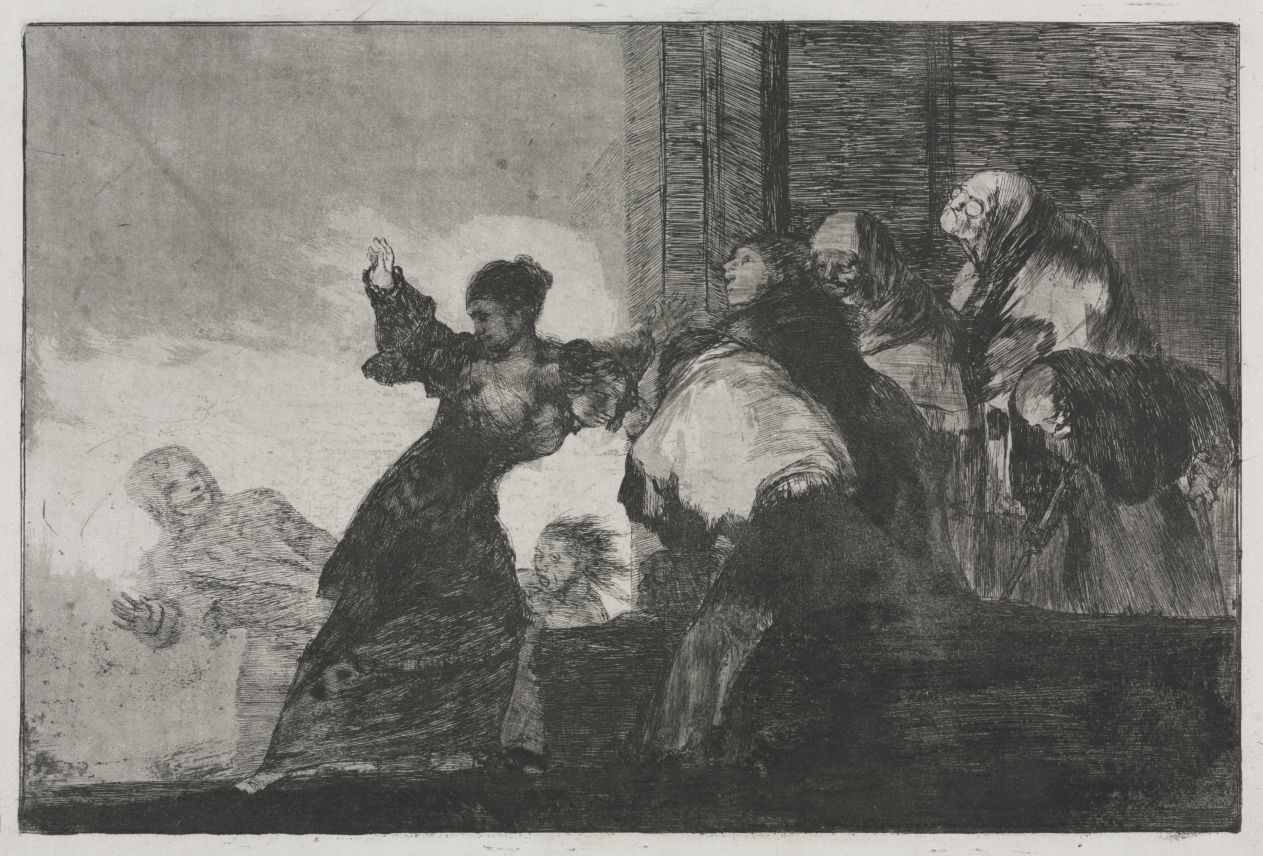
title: The Proverbs: Two Heads are Better than One or Poor Folly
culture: Spain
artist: Francisco de Goya (Spanish, 1746–1828)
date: 1816–1823 (printed c. 1863)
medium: etching, aquatint, drypoint and engraving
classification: Print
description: The Proverbs are a group of 22 prints that are among the most powerful, original, and enigmatic of Goya's etchings. Although many of the scenes can be identified with proverbs, it is hard to judge the political, religious, or social connotations of these works. Many of the prints represent carnival themes, which Goya may have used as an allegory to express ideas concerning the state of Spain and his personal life.